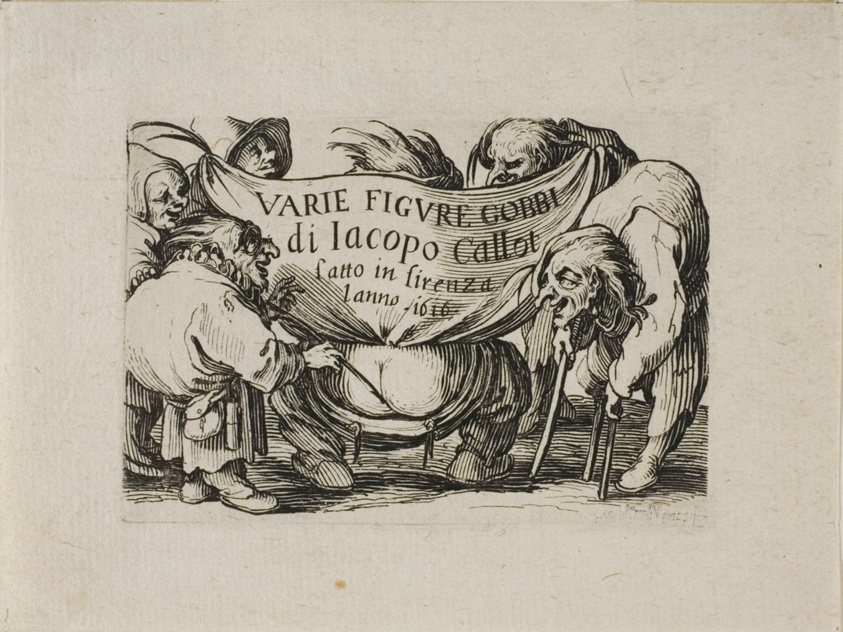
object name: Print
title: Frontispiece, from Varie Figure Gobbi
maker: Jacques Callot (French, 1592-1635)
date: 1616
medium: Etching on paper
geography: France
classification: etching; print; prints and drawing